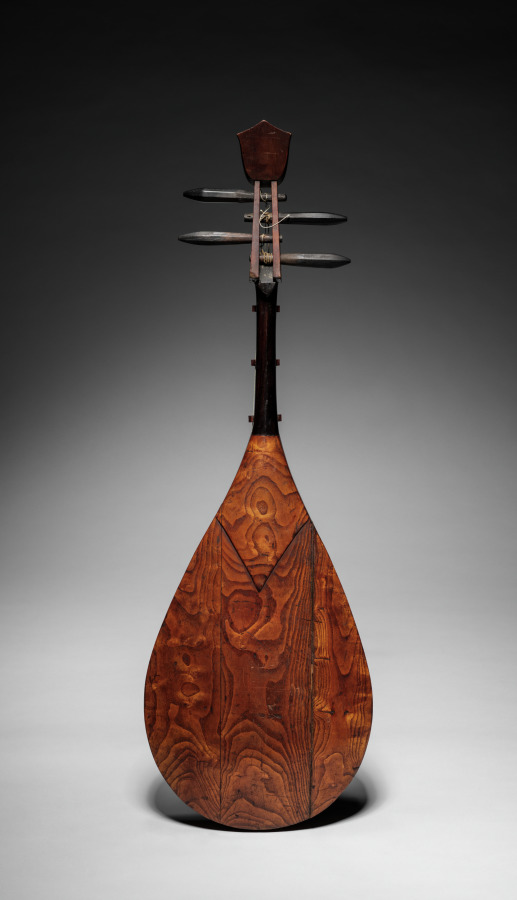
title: Heike Biwa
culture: Japan, Meiji period (1868–1912)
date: c. 1850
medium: Wood, bone, silk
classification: Musical Instrument